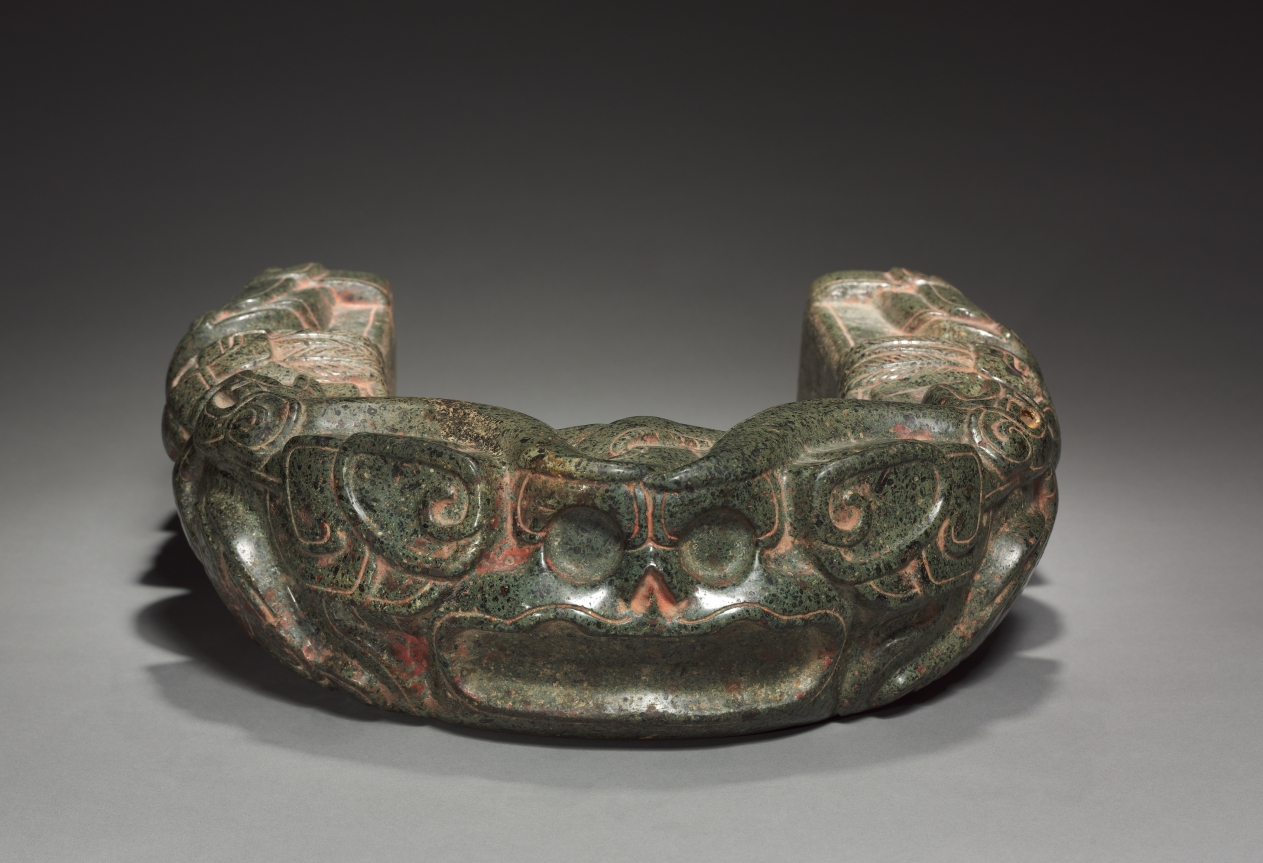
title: Ballgame Hip Protector (Yoke)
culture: Mexico, Gulf Coast, Classic Veracruz style (600-1100)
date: 600–900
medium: greenstone, pigment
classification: Sculpture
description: U-shaped ballgame sculptures imitate the shape of belt-like protectors, perhaps made of wood and padding, worn to shield ballplayers from injury when they returned the solid rubber ball from their hips. This fine example embodies a major theme of the ballgame: the connection between fertility and death. It is made of greenstone, a precious material that through its color symbolizes the lush burgeoning of nature after the rainy season. The imagery, however, is menacing: a monstrous head snarls from the curve, and human skulls appear on the sides.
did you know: The ballgame was a team sport played on specially constructed rectangular courts and involved striking a large solid rubber ball without using your hands.